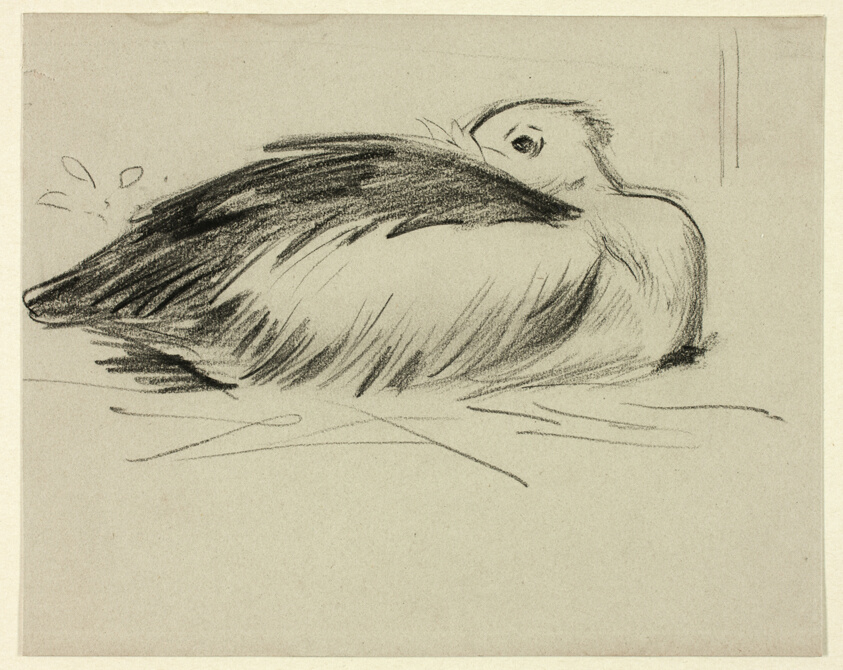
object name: Drawing and Watercolor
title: Sketch of Nesting Stork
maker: Henry Stacy Marks (English, 1829-1898)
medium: Black pastel on gray wove paper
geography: England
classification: pastel; drawings (visual works); prints and drawing